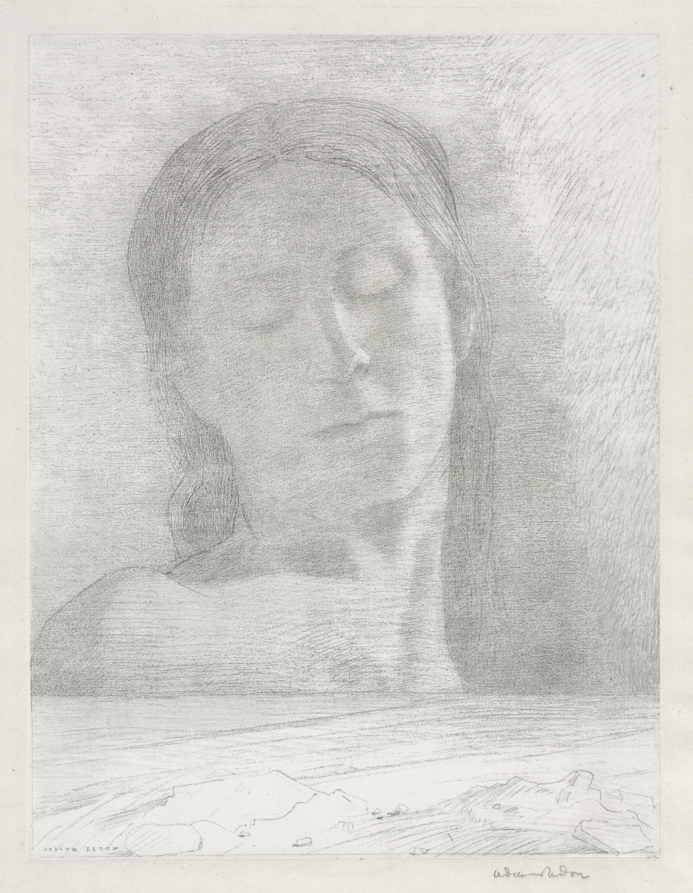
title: Closed Eyes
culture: France, 19th century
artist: Odilon Redon (French, 1840–1916)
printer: Becquet (French)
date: 1890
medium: lithograph on China paper laid on wove paper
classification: Print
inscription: signed on stone, lower left: ODILON REDON; inscribed, at lower right, in graphite: Odilon Redon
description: Odilon Redon explored the image of an androgynous figure with closed eyes in several of his works. He saw the expression as representative of a meditative shift inward and away from the constraints of modern society. By drawing lightly on a lithographic stone, Redon made faint lines that subtly modeled and shaded the head and shoulders while contrasting with the more sketchily drawn, inexplicable landscape in the foreground. Part of the Print Club of Cleveland’s early gift of lithographs by Redon to the museum, this impression is a unique trial proof, printed while the artist was collaborating with master printer Becquet to assess the composition’s progress.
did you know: Despite its androgynous look, this figure has been identified as a portrait of Redon´s wife, Camille Falte.